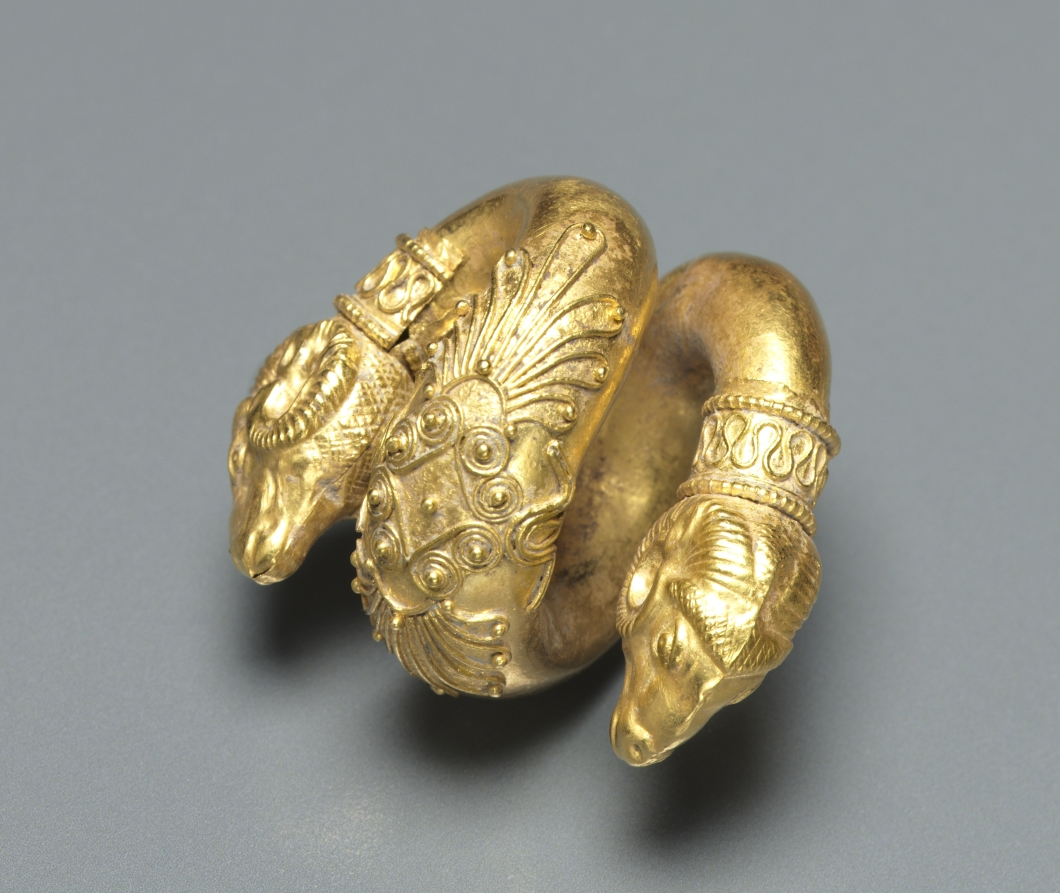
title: Hair Ringlet with Ram Head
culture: Greece, Hellenistic period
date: 400s BCE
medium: gold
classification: Jewelry